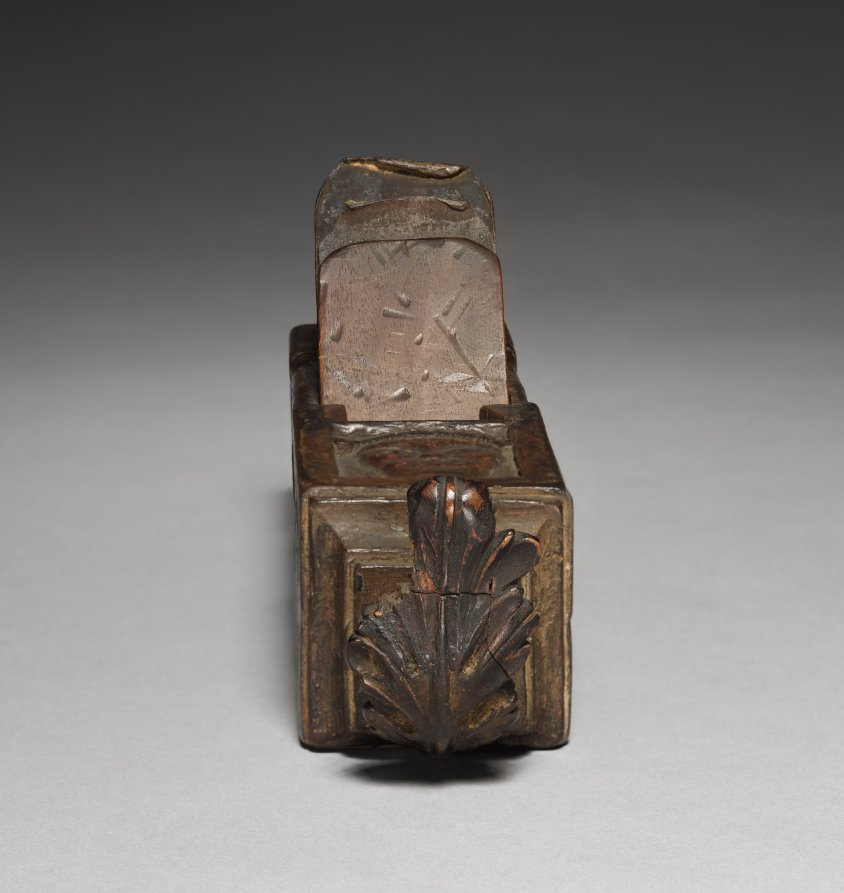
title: Carpenter's Plane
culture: Italy, late 16th century ?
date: late 1500s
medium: wood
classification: Tool